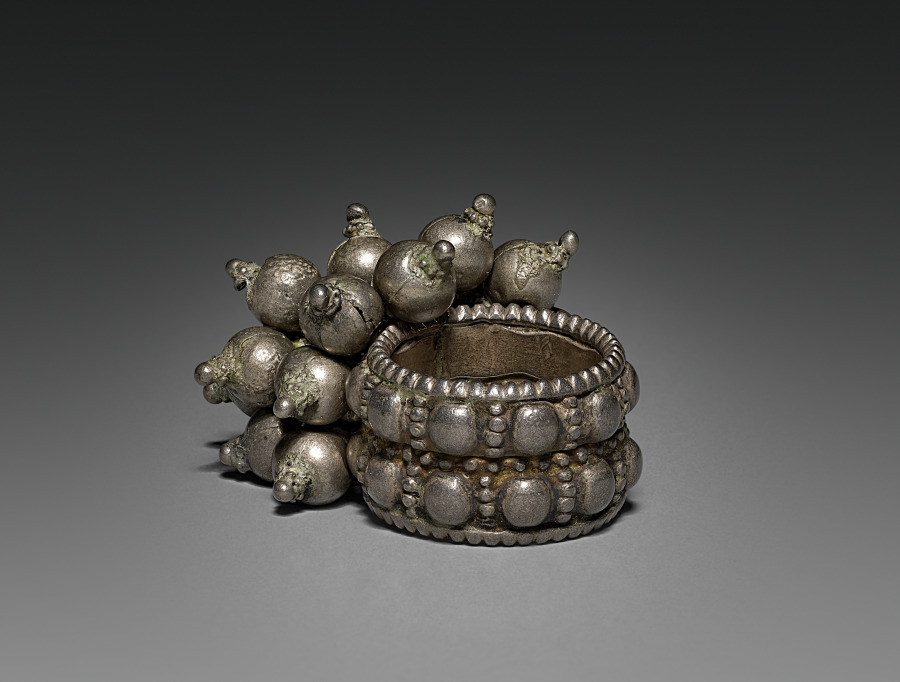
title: Toe-ring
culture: India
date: 1800s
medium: silver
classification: Jewelry